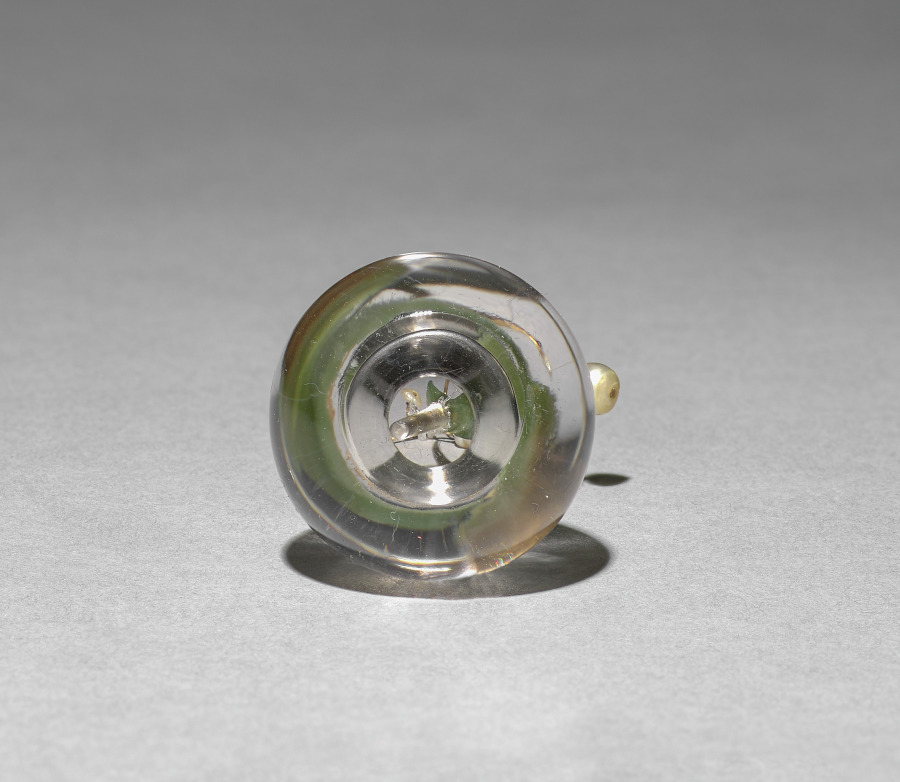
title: Flower Study of a Miniature Lily of the Valley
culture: Russia, St. Petersburg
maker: House of Fabergé (Russian, 1842–1918)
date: c. 1885–1915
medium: pearls, jade, rock crystal, gold, diamonds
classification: Miscellaneous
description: A small, carved rock crystal vase holds this lily of the valley study. The pearls, forming the flower’s buds, are drilled and attached to the remarkably slim gold stem. The hand-cut nephrite (jade) leaves enhance the naturalistic aura of the flower. Fabergé’s inspiration for his flower studies is said to have come from the floral brooches of precious stones that were made in the 1700s for Catherine the Great as well as from the Japanese art of flower arranging, known as ikebana.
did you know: Small and delicate, Fabergé’s flower studies were given as intimate gifts to friends by Tsarina Alexandra and others in the court. She kept them in all the palaces as a reminder of spring during the harsh Russian winters.